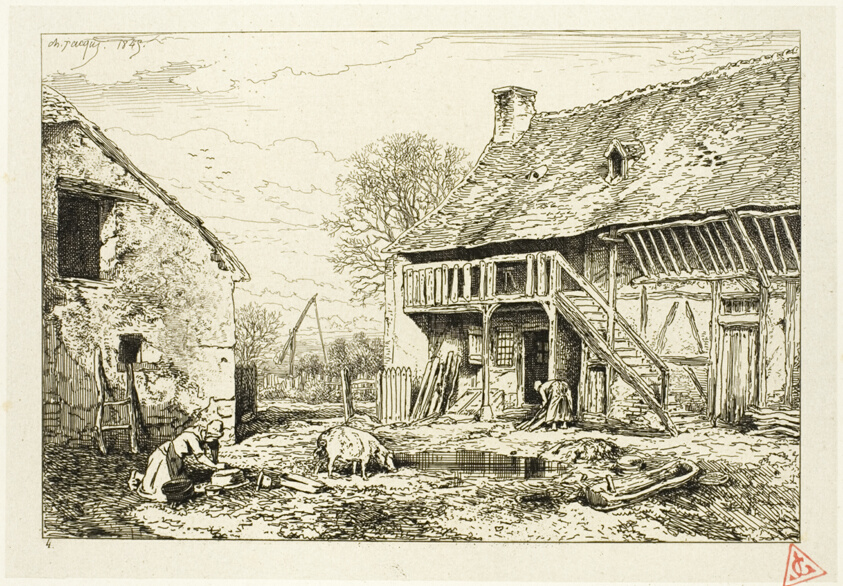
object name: Print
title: Courtyard of a Peasant Dwelling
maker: Charles Émile Jacque (French, 1813-1894)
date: 1845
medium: Etching on light gray China paper laid down on ivory wove paper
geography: France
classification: etching; print; prints and drawing